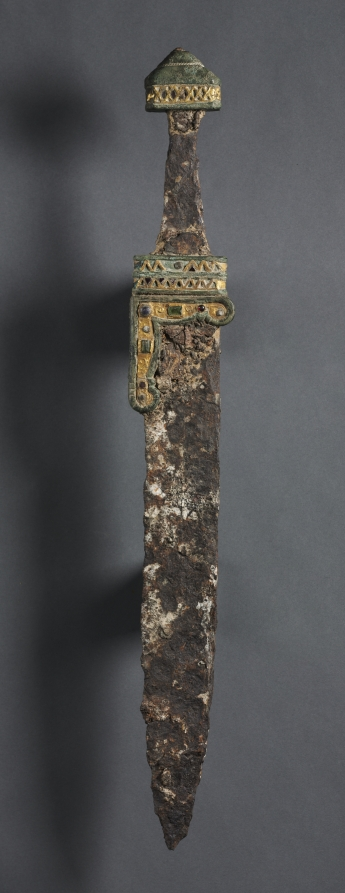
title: Single-Edged Knife (Scramasax)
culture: Merovingian, Migration period, 6th-7th Century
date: c. 500–700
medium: iron, brass, gold foil, gold wire, gemstones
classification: Arms and Armor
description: The scramasax, a single-edged knife, was a general purpose implement. It could serve equally well as a tool or as a weapon and usually did not exceed 12 inches in length. As with most objects of the Migration period, iron weapons survive as excavated grave goods and tend to be heavily corroded. The grips, now missing, were probably fashioned from wood or bone and silver inlay decorated the pommels (the knob on the hilt, or handle). The ornamental gold foil bands, perhaps from the original scabbards (the cases in which the blades of swords or daggers are kept) have survived relatively intact.